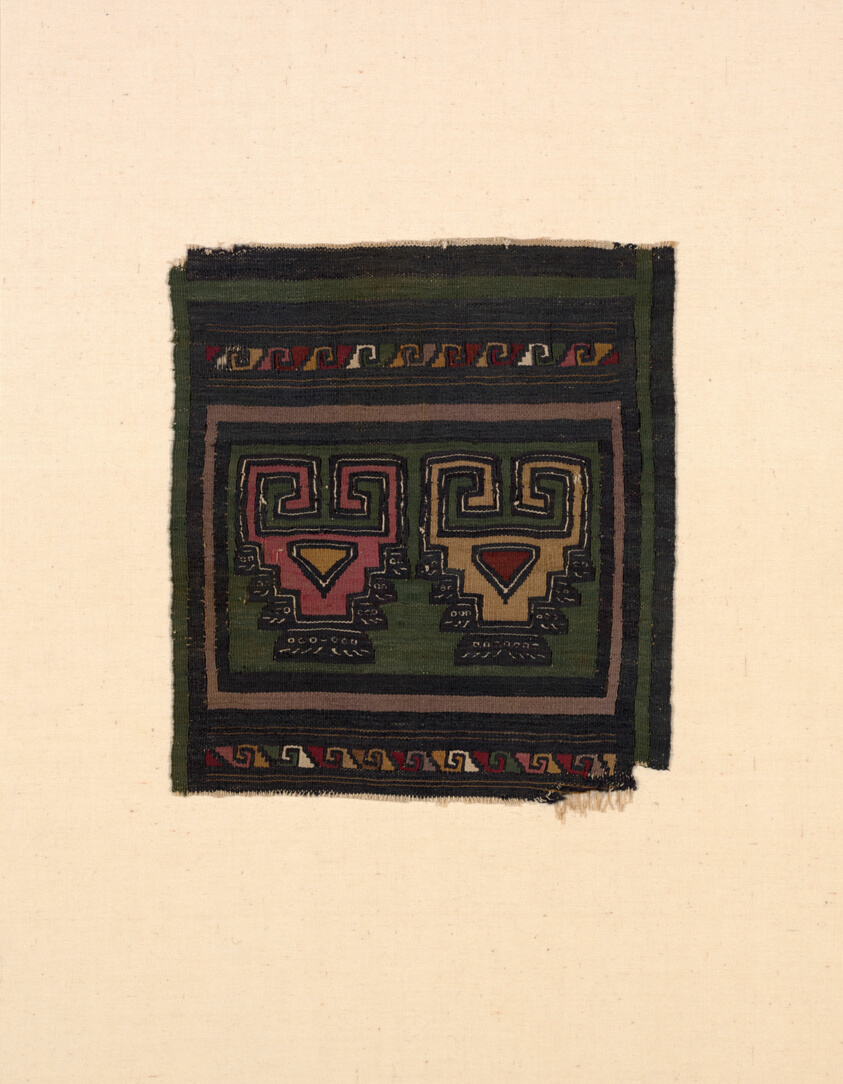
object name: Textile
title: Fragment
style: lambayeque, pachacamac, middle horizon, Pre-Columbian, americas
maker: Lambayeque (Probably north coast, Peru)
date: A.D. 1000/1476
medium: Cotton and wool (camelid), slit and single dovetailed tapestry weave with eccentric and wrapping outlining wefts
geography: Peru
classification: textile; weaving